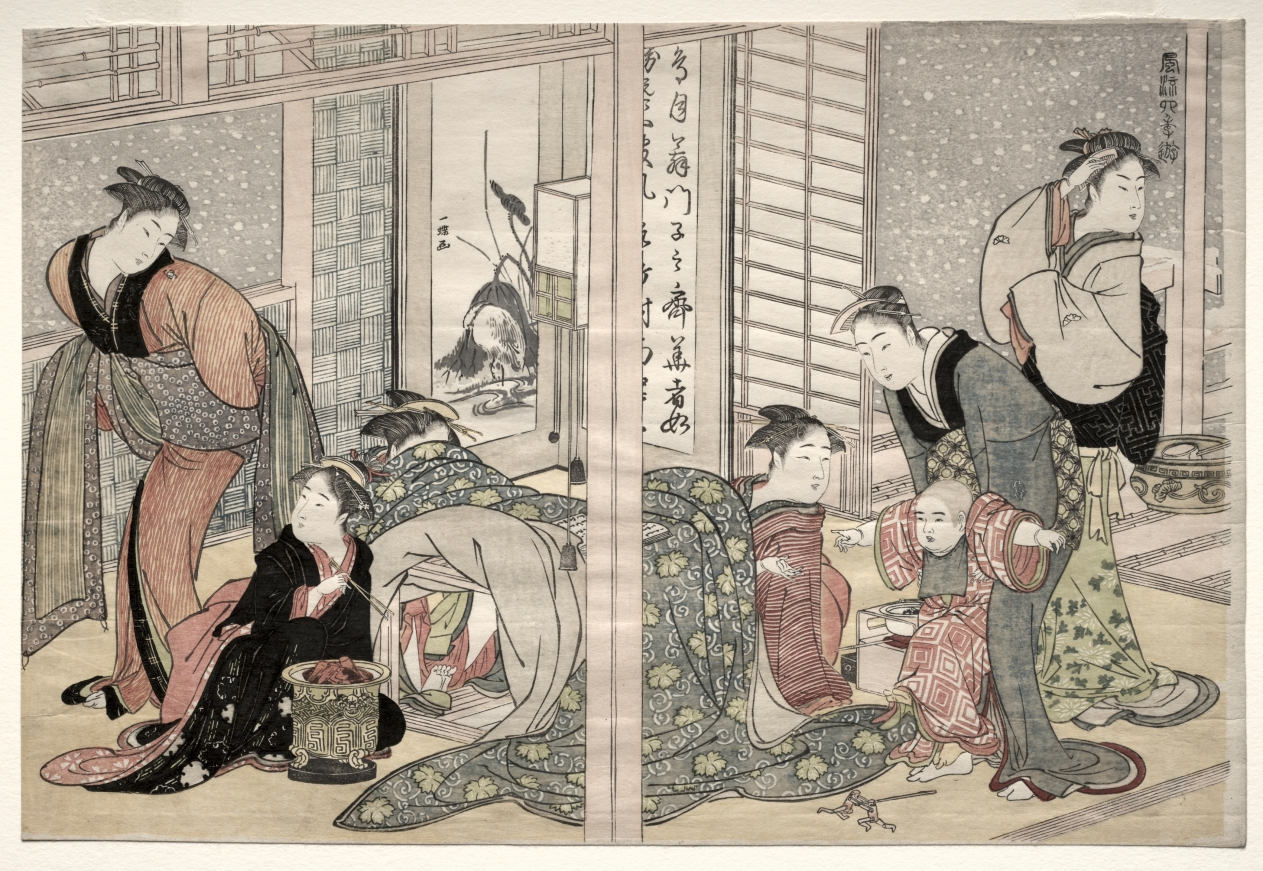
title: Elegant Pleasures of the Four Seasons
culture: Japan, Edo period (1615–1868)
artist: attributed to Kitagawa Utamaro (Japanese, 1753?-1806)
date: c. 1782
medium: Woodblock print; ink and color on paper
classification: Print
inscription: Itchō ga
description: The title of this print suggests a series of four, but only this wintry print is known. A boy has dropped his toy wrestlers as he is hoisted up to a woman who has been enjoying a book at the heated table. Her companion buries her head beneath the blanket to stay warm, her bare feet exposed by a girl tending the hot coals in the pit in the floor.